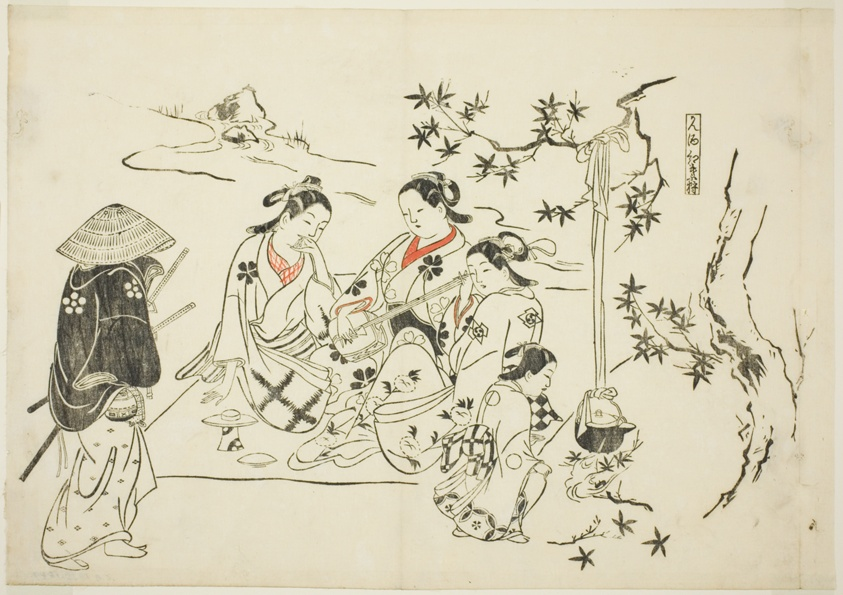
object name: Print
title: Heating Sake with Maple Leaves (Kanzake momijigari), no. 9 from a series of 12 prints depicting parodies of plays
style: Japanese (culture or style)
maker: Okumura Masanobu (Japanese, 1686-1764)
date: c. 1716/35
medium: Hand-colored woodblock print; oban, sumizuri-e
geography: Japan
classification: woodblock print; print; asian art